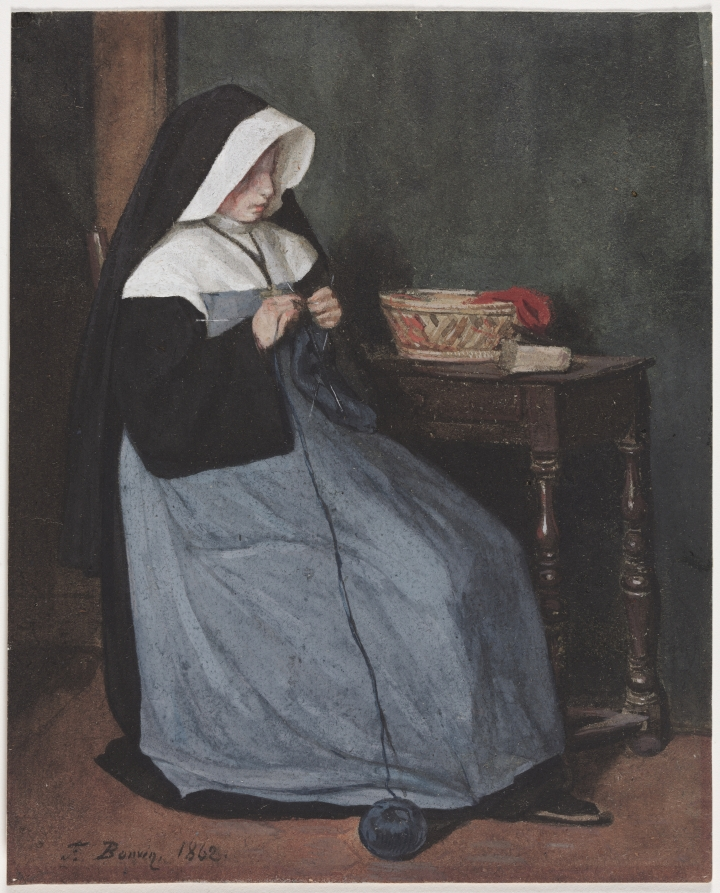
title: A Nun Seated at a Table Knitting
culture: France, 19th century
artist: François Bonvin (French, 1817–1887)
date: 1862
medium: gouache and watercolor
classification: Drawing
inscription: lower left, in black gouache: F. Bonvin. 1862.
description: François Bonvin was a prolific watercolorist, and he developed a lifelong interest in modest religious subjects showing scenes of everyday life. This delightfully simple image of a nun knitting reveals the artist's appreciation for 17th-century Dutch artists such as Johannes Vermeer (1632-1675), whose work he copied.